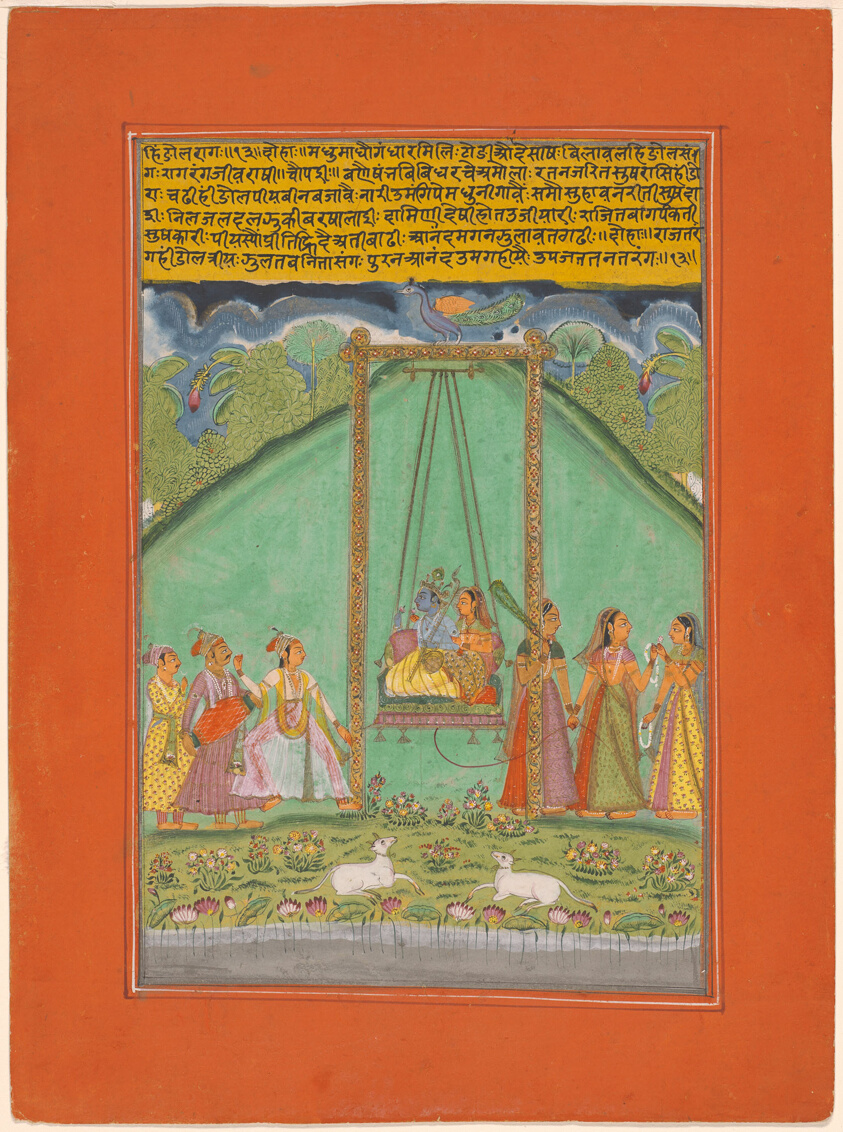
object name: Painting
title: Hindol Raga, page from a Garland of Musical Ragas (Ragamala) Set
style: South Asian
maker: India; Rajasthan, Jaipur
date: c. 1750-1770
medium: Opaque watercolor on paper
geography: Rajasthan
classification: miniature painting; painting; asian art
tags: music, musicians